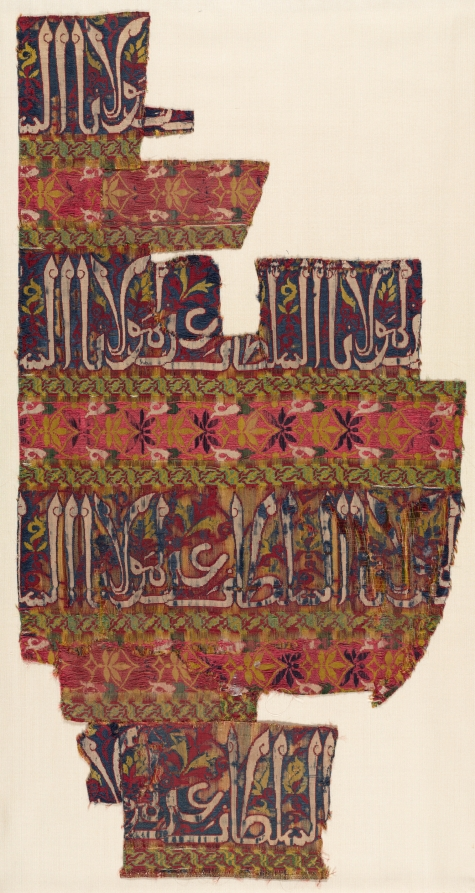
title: Silk Fragment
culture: Spain, Islamic period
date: 1300s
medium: silk: diasper weave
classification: Textile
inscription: Naskhi inscription: "Glory to our Lord, the Sultan."